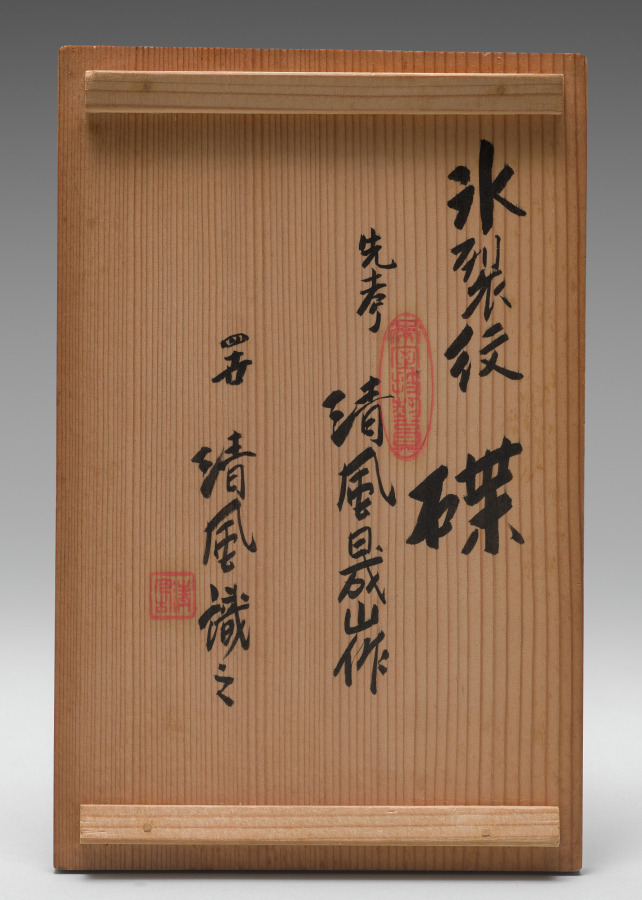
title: Saucers with Matching Shells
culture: Japan, Meiji period (1868–1912)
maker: Seifū Yohei III (Japanese, 1851–1914)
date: 1893–1914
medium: Pair of dishes; porcelain with green glaze and crackling, molded design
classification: Ceramic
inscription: 清風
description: Yohei III’s main output for his sophisticated clientele was in the form of tea sets and dining sets. He created a range of dishes in green glazes. He often produced in pairs, sets of five, or sets of ten. This pair of shell dishes have a box lid interior attestation by Yohei IV that the dishes were made by Yohei III with a cracked-ice (hyōretsu) pattern in the glaze, omitting reference to any glaze coloration.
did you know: These shell-shaped dishes are of the saucer type, suitable for dipping sauces.